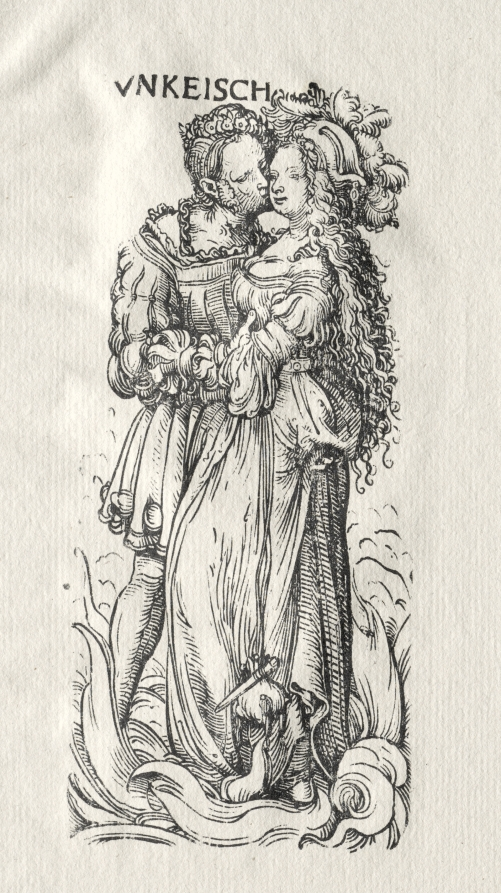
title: The Seven Vices: Lust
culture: Germany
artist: Hans Burgkmair (German, 1473–1531)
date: c. 1510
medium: woodcut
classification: Print